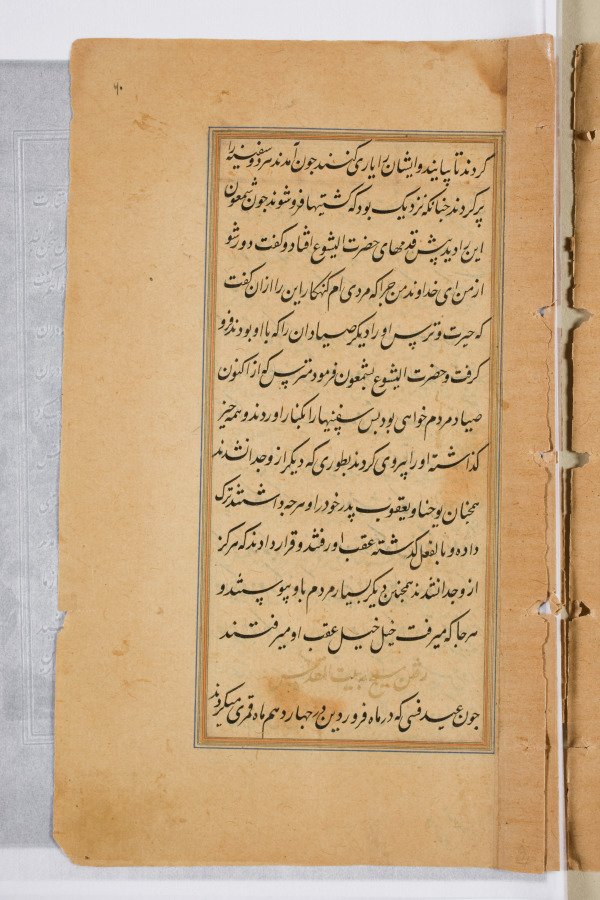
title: Text page from a Mirror of Holiness (Mir’at al-quds) of Father Jerome Xavier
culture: Mughal India, Allahabad, made for Prince Salim (1569–1627)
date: 1602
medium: Ink and gold on paper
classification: Manuscript